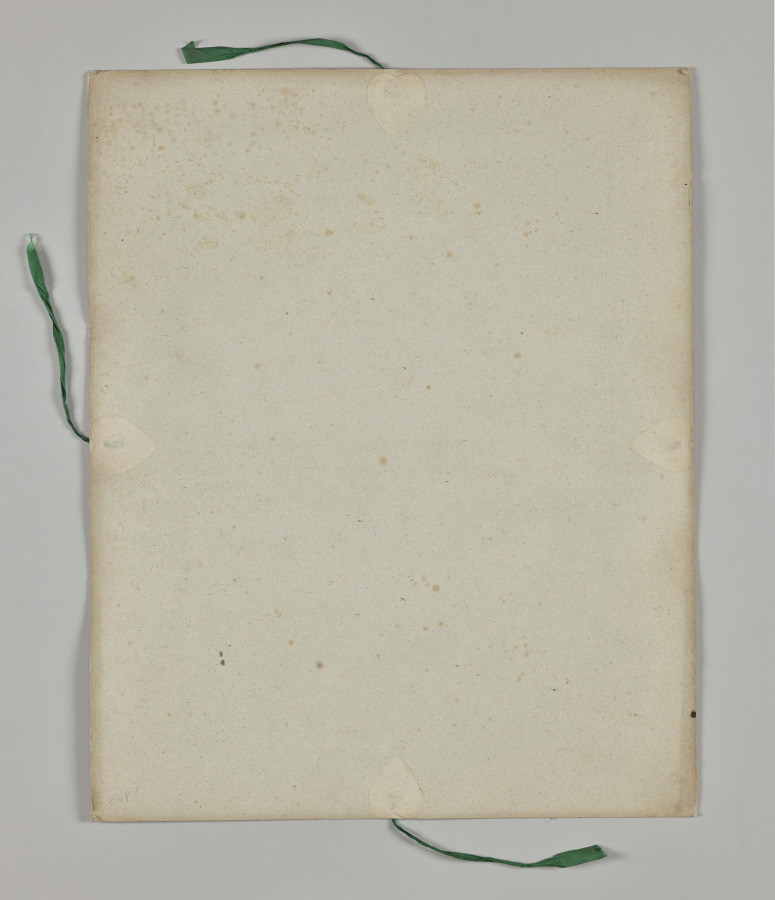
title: Seven Areas from Salzburg and Berchtesgaden. Arranged according to the seven days of the week, connected by two allegorical sheets (Slipcover)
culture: Germany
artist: Ferdinand Olivier (German, 1785–1841)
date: 1818–23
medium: Original slipcase cover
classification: Portfolio